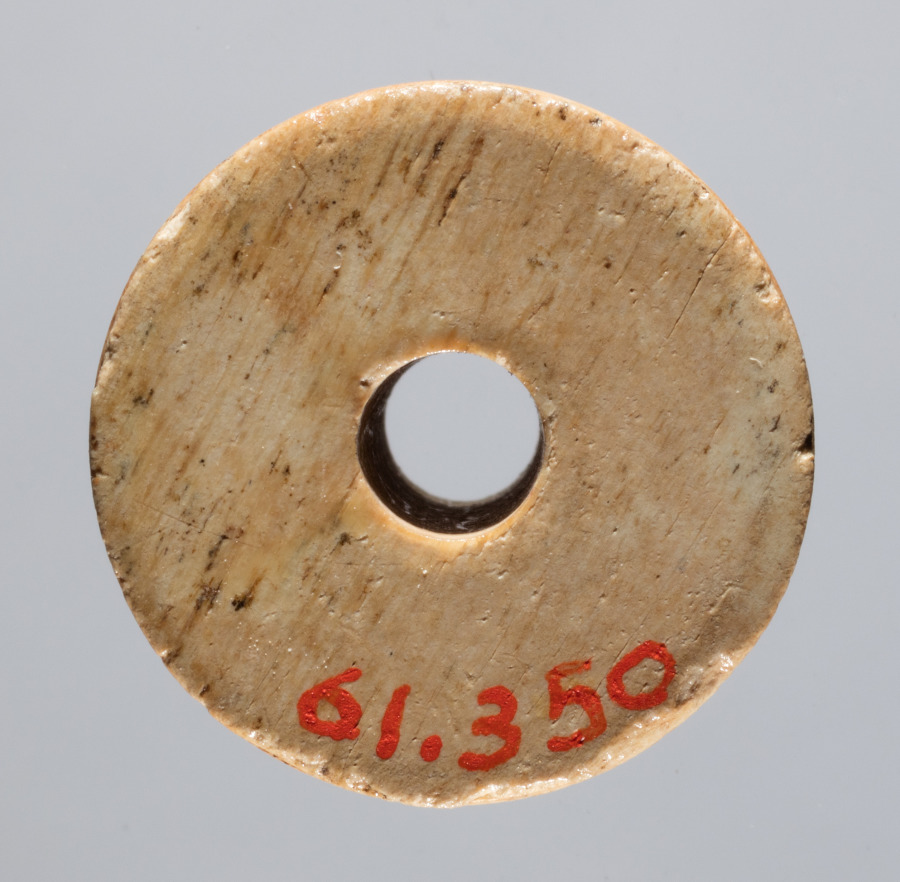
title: Spindle Whorl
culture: Iran, early Islamic period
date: 700s - 900s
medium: bone, incised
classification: Spindle Whorl